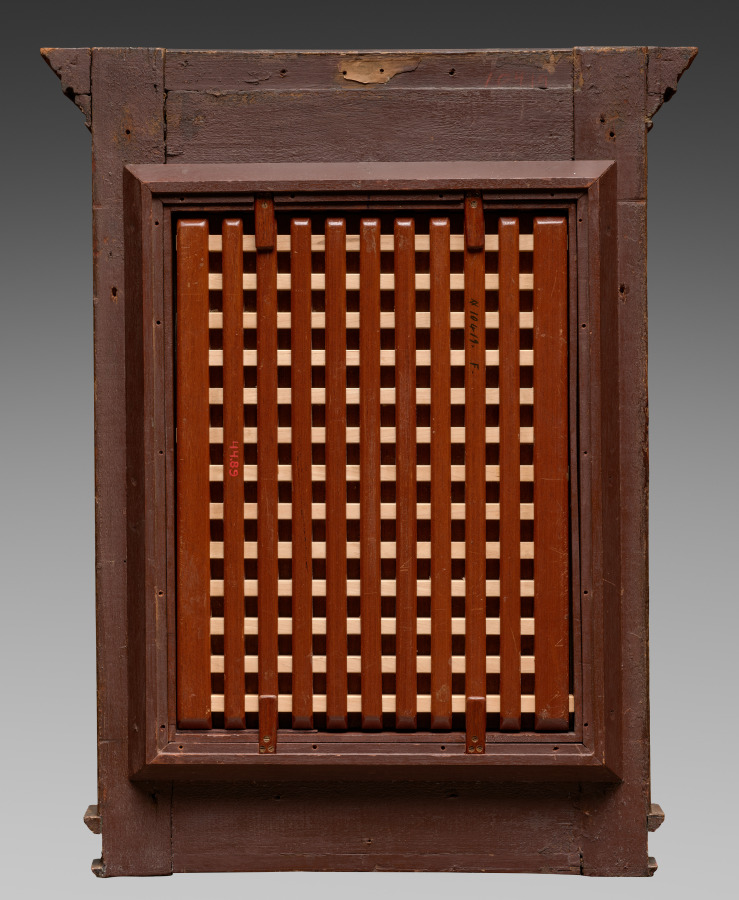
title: Virgin and Child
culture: Italy, late 15th Century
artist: Pintoricchio (Italian, c. 1454–1513)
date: c. 1490–1500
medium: tempera and oil on wood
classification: Painting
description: Bernardino di Betto, called Pinturicchio, is said to have acquired his nickname ("little painter") because of his small stature, and used it to sign some of his paintings. Born in Perugia, the provincial capital of Umbria, he trained under local artists, eventually becoming a paid assistant of the painter Perugino. He is known to have assisted Perugino on his frescoes in the Sistine Chapel and eventually established his own reputation as a respected artist. Many of his commissions were for churches and wealthy families in Umbria and elsewhere. Though the source of this painting is unknown, it was likely produced for a home or private chapel.